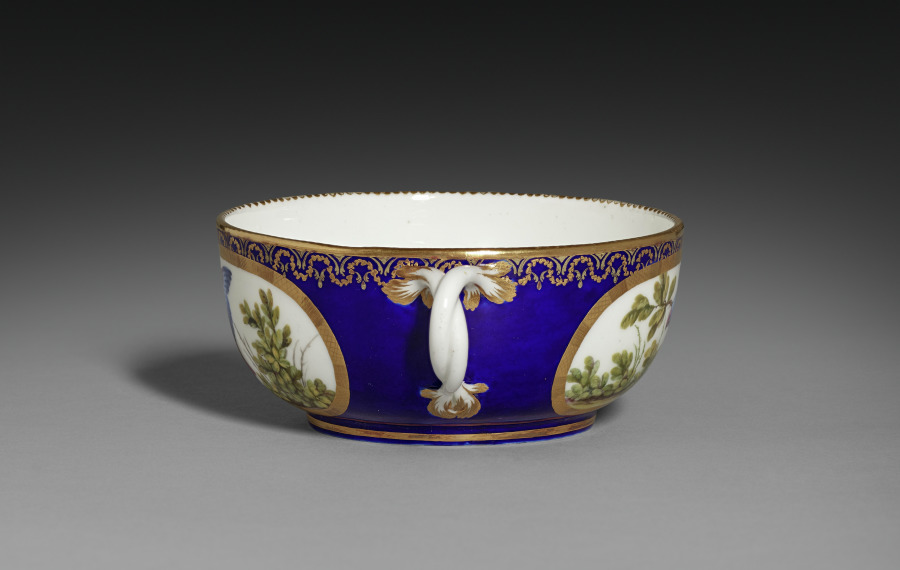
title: Broth Bowl (Écuelle Ronde)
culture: France, Sèvres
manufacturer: Sèvres Porcelain Factory (French, est. 1756)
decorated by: François-Joseph Aloncle (French)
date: 1772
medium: soft-paste porcelain with enamel and gilt decoration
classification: Ceramic